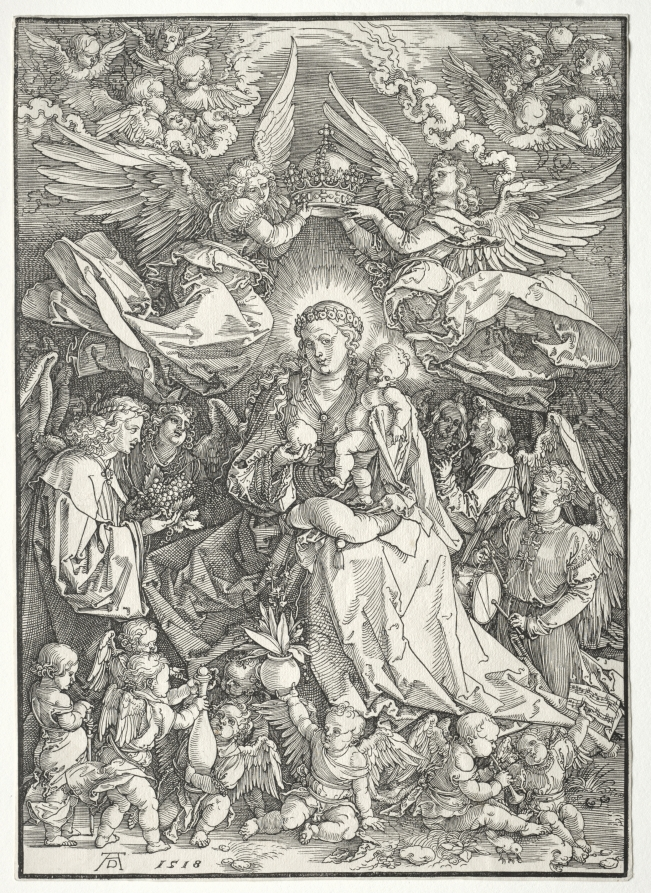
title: The Virgin Surrounded by Many Angels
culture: Germany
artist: Albrecht Dürer (German, 1471–1528)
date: 1518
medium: woodcut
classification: Print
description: In this lively woodcut, Dürer evokes the Coronation of the Virgin, the last event in the cycle of prayers known as the Glorious Mysteries of the Rosary. She is about to be crowned Regina caeli, the Queen of Heaven, as angels and cherubs celebrate with gifts, music-making, and merriment. Dürer’s shallow use of space and symmetrical arrangement draw attention to the Madonna’s gaze, a fixed look that conveys both her attentiveness and compassion for those who are devoted to her.